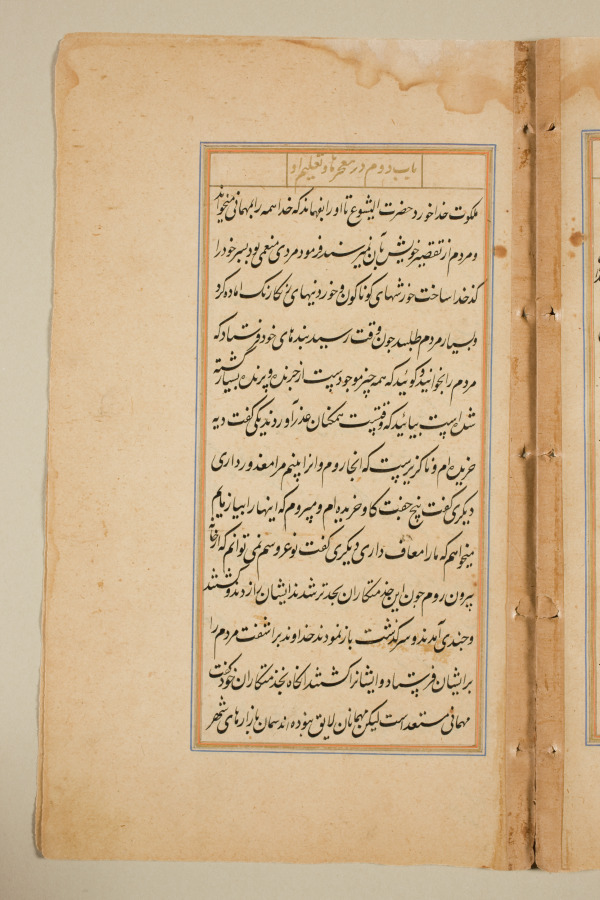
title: Text page from a Mirror of Holiness (Mir’at al-quds) of Father Jerome Xavier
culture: Mughal India, Allahabad, made for Prince Salim (1569–1627)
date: 1602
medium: Ink and gold on paper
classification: Manuscript